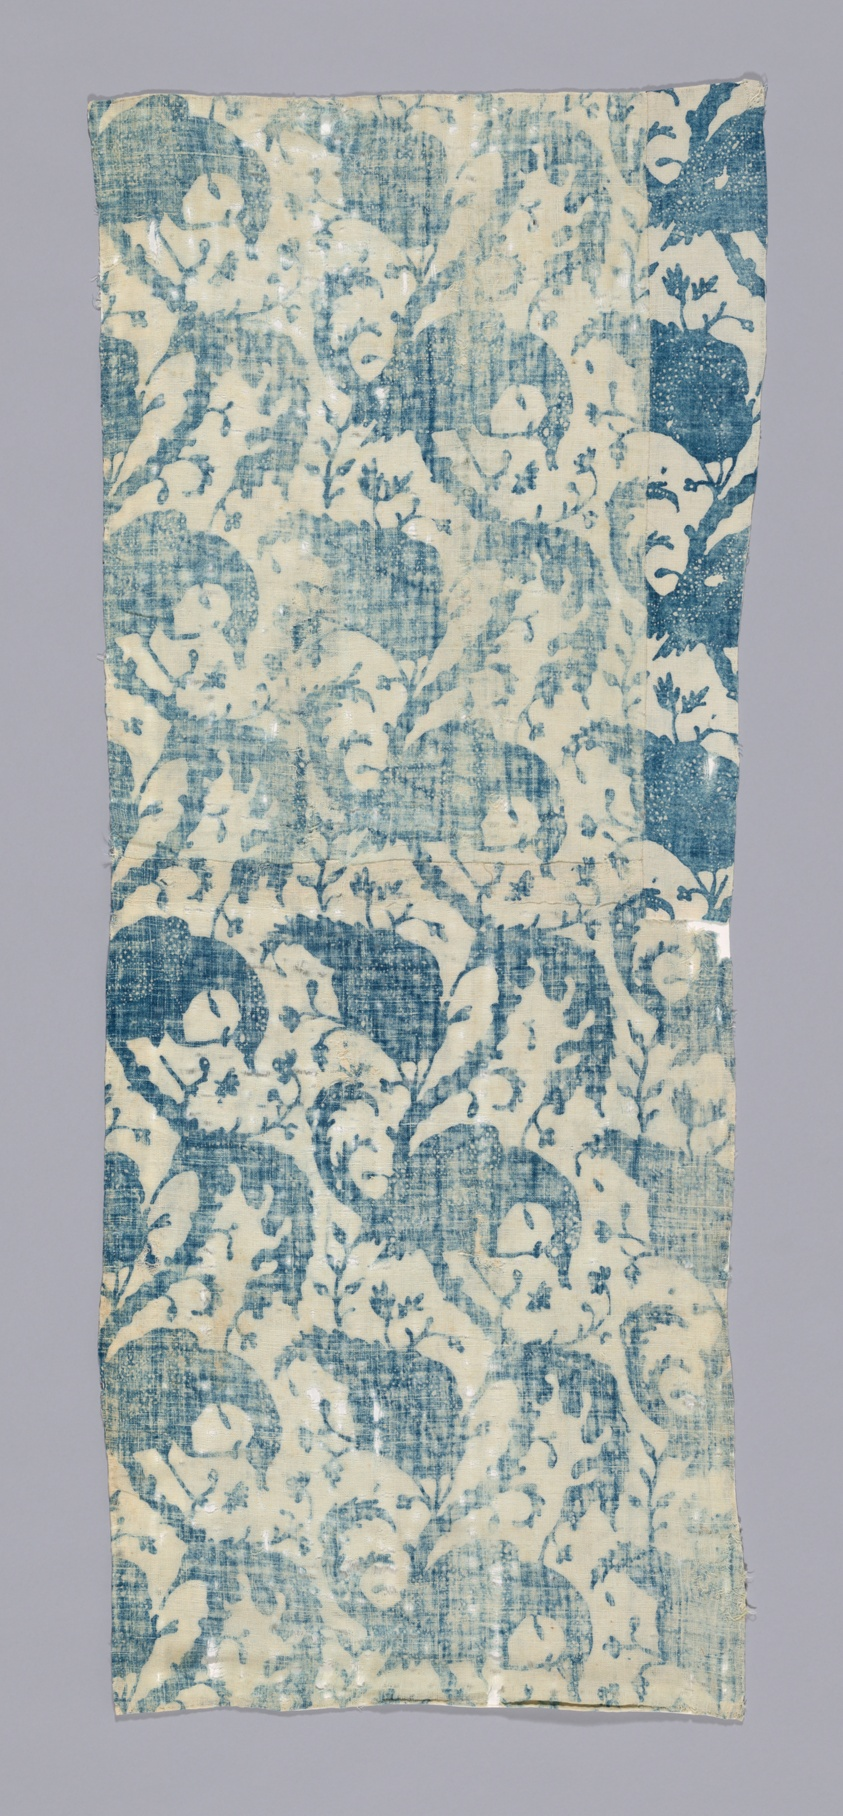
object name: Textile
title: Panel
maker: United States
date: 1775/1800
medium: Cotton, plain weave; resist printed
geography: United States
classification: textile; weaving - printed